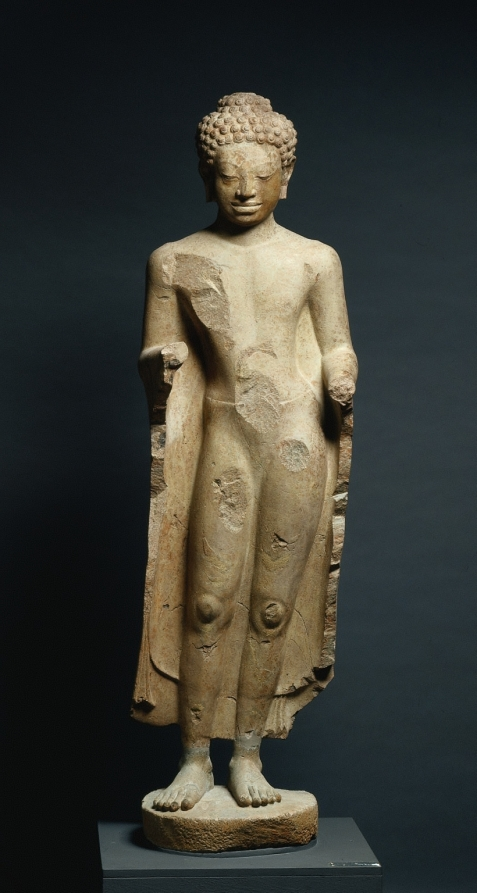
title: Buddha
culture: Thailand, probably Shri Thep, Mon-Dvaravati style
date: 600s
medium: sandstone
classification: Sculpture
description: This elegant, monumental sculpture is the earliest type of Buddha image to be made in Southeast Asia. It comes from a site in north-central Thailand that was part of the Dvaravati kingdom (500s–1200s). The body shows direct links with the sculptural traditions at Sarnath in northern India on the banks of the Ganges River. The expression of the face has the peaceful introspection that became canonical during the Gupta period of the 5th century in India. The shape of the head and facial features—unlike Indian precursors—suggest that the artists and patrons of Dvaravati made the Buddha resemble the local Mon population. The figure's stance has been rendered with remarkable fluidity, and the abstracted caps of the knees and minimalist modeling of the pelvis lend the figure an otherworldly, transcendent demeanor, balanced by the approachable smiling countenance.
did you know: Now reunited for display, CMA acquired the sculpture in two pieces, when the feet (CMA 1974.91) and the body were found in separate locations.